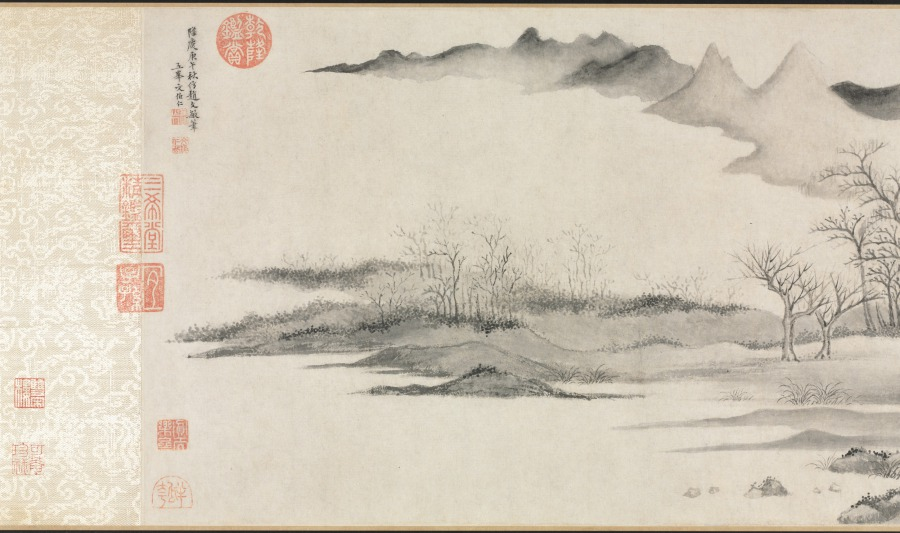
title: Water Village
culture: China, Ming dynasty (1368–1644)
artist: Wen Boren (Chinese, 1502–1575)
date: 1570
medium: handscroll; ink and light color on paper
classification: Painting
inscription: 隆慶庚午秋仿趙文敏筆. 五峰文伯仁 [印] 五峰山人; 文伯仁印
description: In the autumn of 1570, Wen Boren painted this seemingly unemotional scene of low-lying marshlands with a chain of rounded mountains in the background. A fishing boat is nestled on the shore near the village. Although paths and bridges traverse the landscape, only two people are visible in the stillness. From the restrained atmosphere of this landscape, one would never guess that Wen Boren was known as the “bad boy” of the Wu School for his explosive temper. As a younger man, he was even embroiled in a contentious lawsuit with his own uncle, Wen Zhengming (1470–1559), a master of Ming dynasty painting with whom he had trained. The ideal of the scholar-painter, or literati, was that an artist’s moral character is reflected in his paintings, so there was great incongruity between Wen Boren’s difficult personality and his restrained landscapes. A contemporary, Wang Shizhen, wrote this about him: "This gentleman is prone to behave odiously and screamed accusations at people. How is it possible for him to carry in his bosom such a wealth of scenic wonders?" Who knows what effort it took to subdue his fractious spirit to project an image of coolness and refined taste in his paintings?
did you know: A foreground tree has an eccentric twisting silhouette and pepper-dot "halo" of leaves.